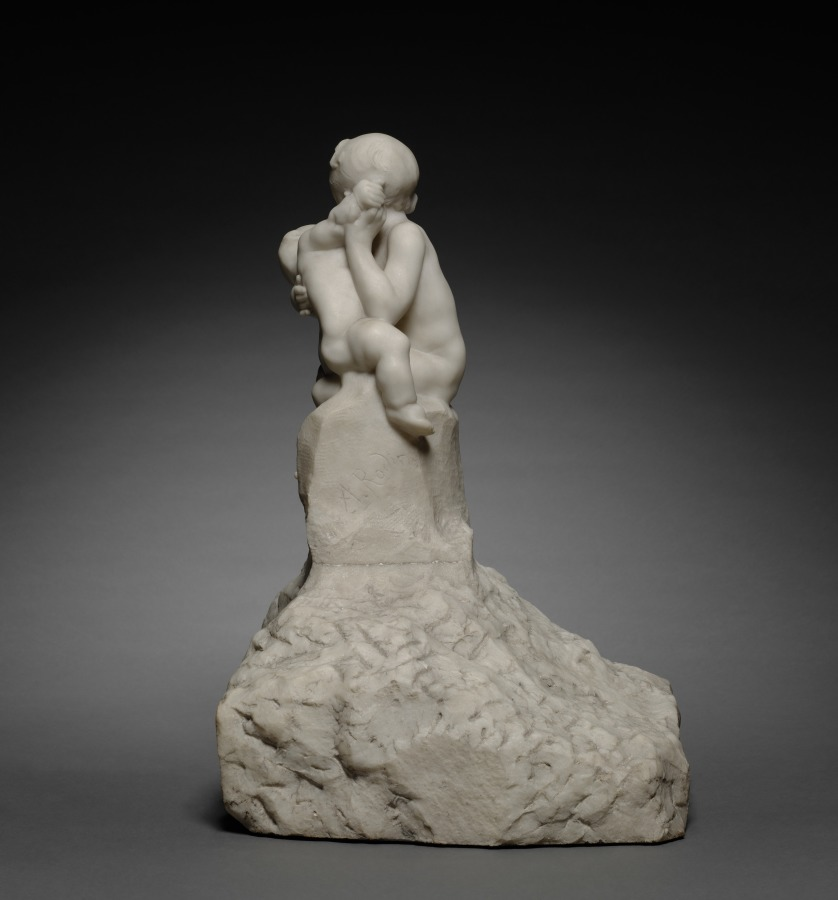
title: Little Brother and Sister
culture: France, early 20th Century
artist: Auguste Rodin (French, 1840–1917)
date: 1916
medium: marble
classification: Sculpture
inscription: Signed on base beneath figures: "A. Rodin"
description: Rodin spent years exploring new ways of representing the human emotions of love and affection experienced at different stages of life. The bodies and gestures of the children here suggest an innocent foreshadowing of the mature couple in the artist’s celebrated sculpture The Kiss of 1882. Both works feature a strong tactile contrast between the rough-hewn lower area and the smooth surfaces of the nude body above. Upwardly spiraling forms, combined with shifting areas of light and shadow, infuse the sculpture with dynamic energy.